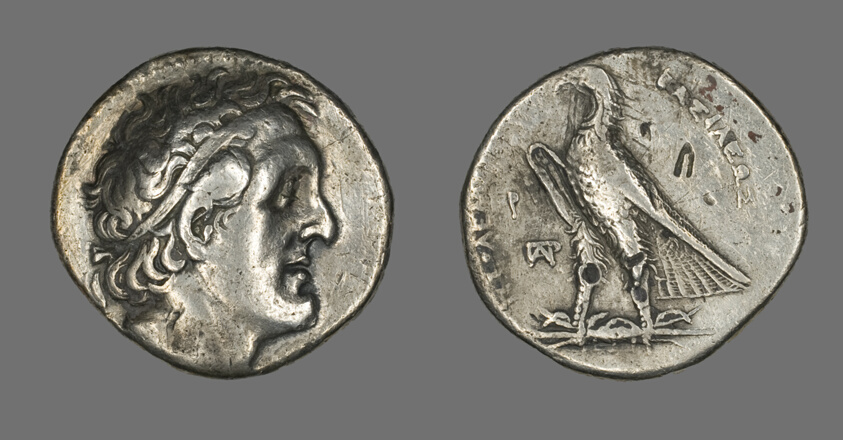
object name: Coin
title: Tetradrachm (Coin) Portraying Ptolemy I Soter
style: ptolemaic, greco-roman (egyptian)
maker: Greek, Ptolemaic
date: 305-284 BCE and later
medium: Silver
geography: Egypt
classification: coin; ancient art